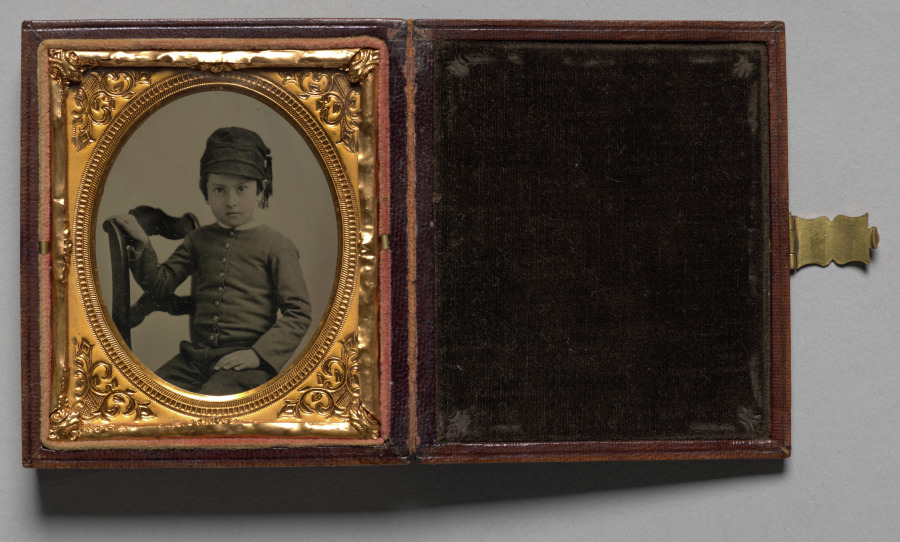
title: Seated boy in tasseled cap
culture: America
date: c. 1858–61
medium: ambrotype, sixth plate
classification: Photograph